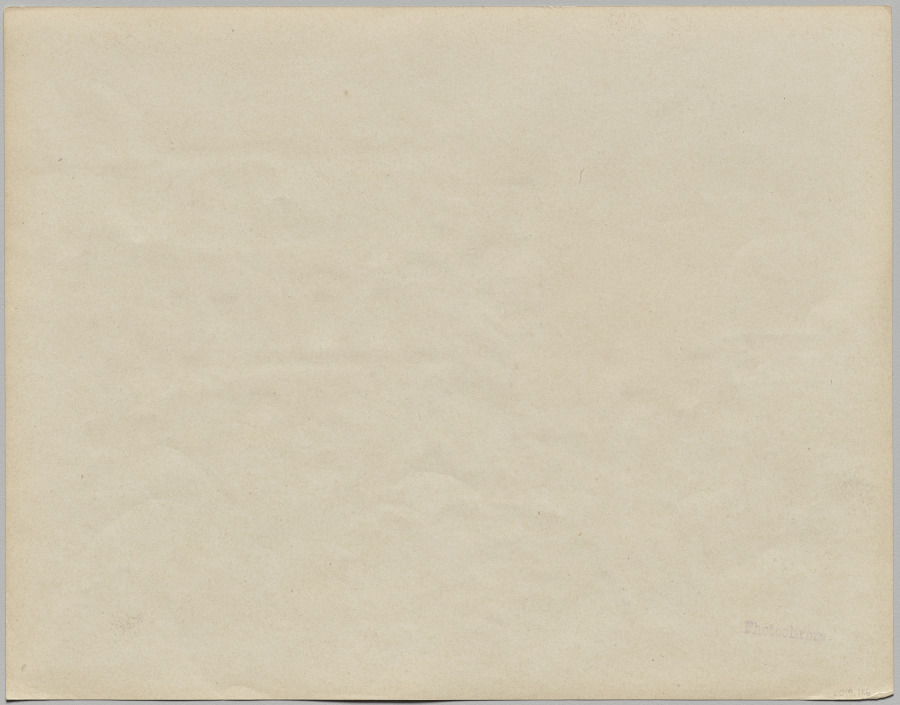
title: India. Calcutta. Harrison Road I with Group of Jogees, after photo by Dr. Kurt Boeck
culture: India, 19th century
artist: Photoglob Co. (Zurich, active c. 1890–1910)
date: c. 1890–1910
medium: Photochrom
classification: Photograph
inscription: Imprinted in gold type on recto: “2003.P.Z-CALCUTTA. HARRISON ROAD.I”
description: The light poles in the image suggest the photo was taken after that event. The Jogees or Jogis are a rapidly shrinking caste that began as a community of people who practiced yoga and worshipped the Hindu god Shiva. Many earn their living as religious beggars. They traditionally wear saffron-colored clothing, but the printers in Switzerland who added the color to this image did not know that.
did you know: In 1899, Harrison Road (now Mahatma Gandhi Road) became the first road to be lit by electricity in Kolkatta (formerly Calcutta).